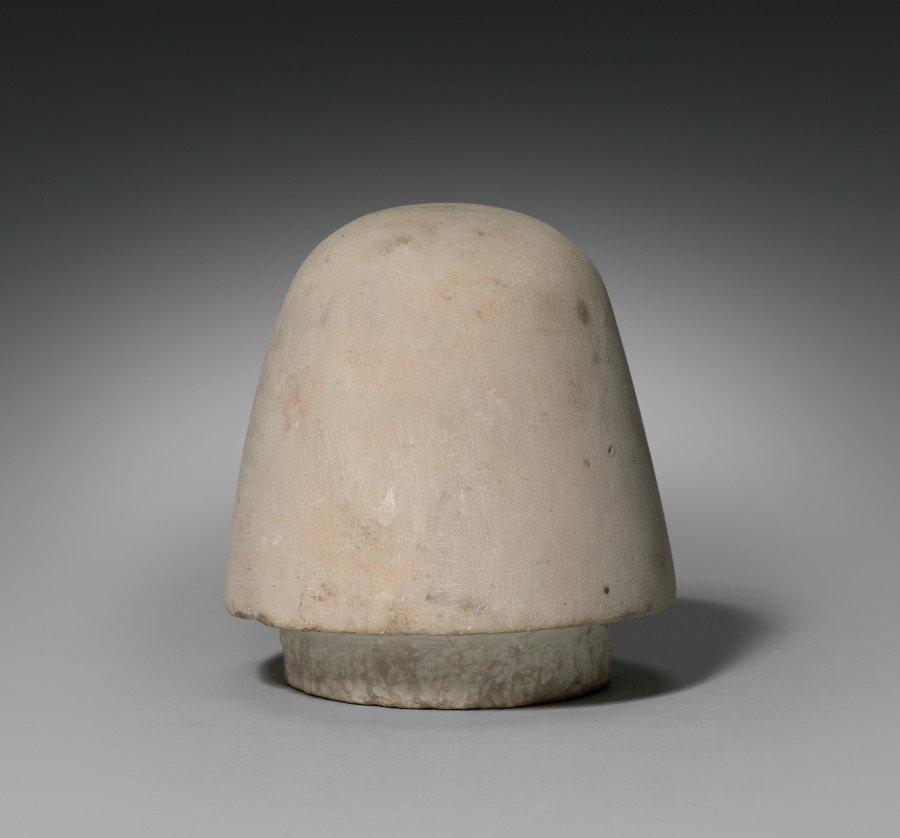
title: Canopic Jar with Lid (lid)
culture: Egypt, New Kingdom (1540–1069 BCE), Dynasty 18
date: 1540–1296 BCE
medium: limestone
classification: Funerary Equipment